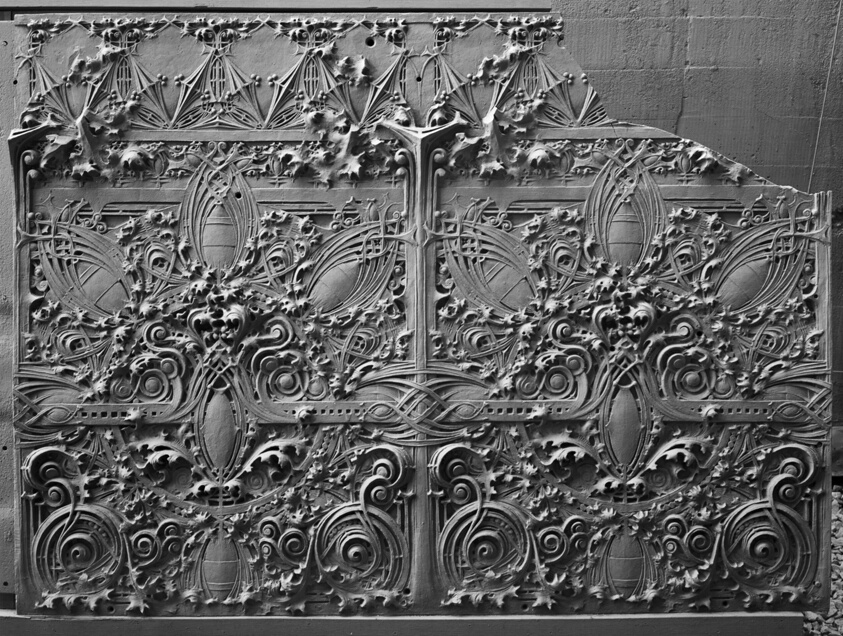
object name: Architectural fragment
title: Spandrel Panel from the Gage Building, Chicago, Illinois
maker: Louis H. Sullivan (American, 1856–1924); Modeled by Kristian Schneider (American, born Norway, 1864–1935); Cast by Winslow Brothers Iron Works (American, 1887–1921); Architect: Holabird & Roche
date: 1898–99 (removed 1955)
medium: Cast iron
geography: Chicago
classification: architectural fragment; architecture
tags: Chicago, architectural fragment, architecture, building, facade, ornamental